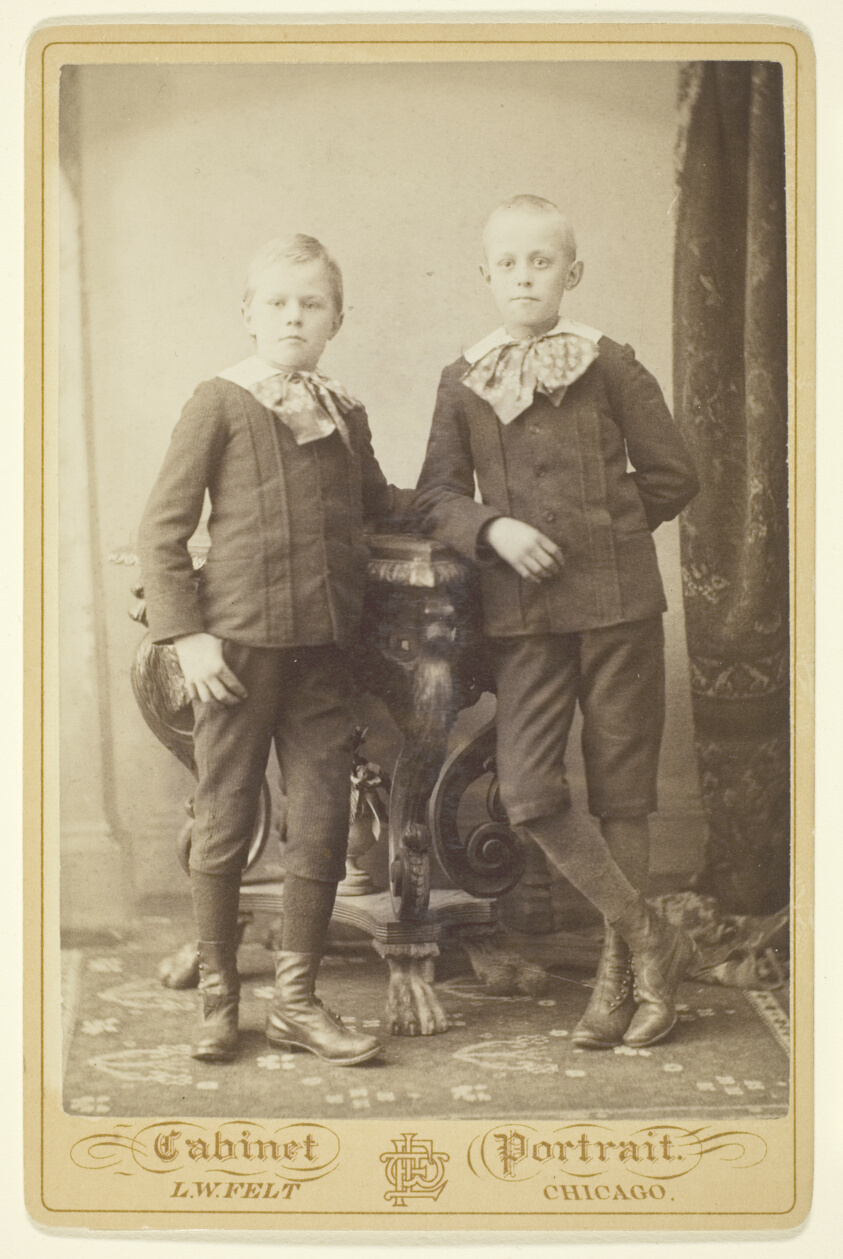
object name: Photograph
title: Two Boys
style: 19th century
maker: L. W. Felt (American, active late 19th century)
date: 1870/99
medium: Albumen print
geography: United States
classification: albumen silver print; photographic process; photography; photograph